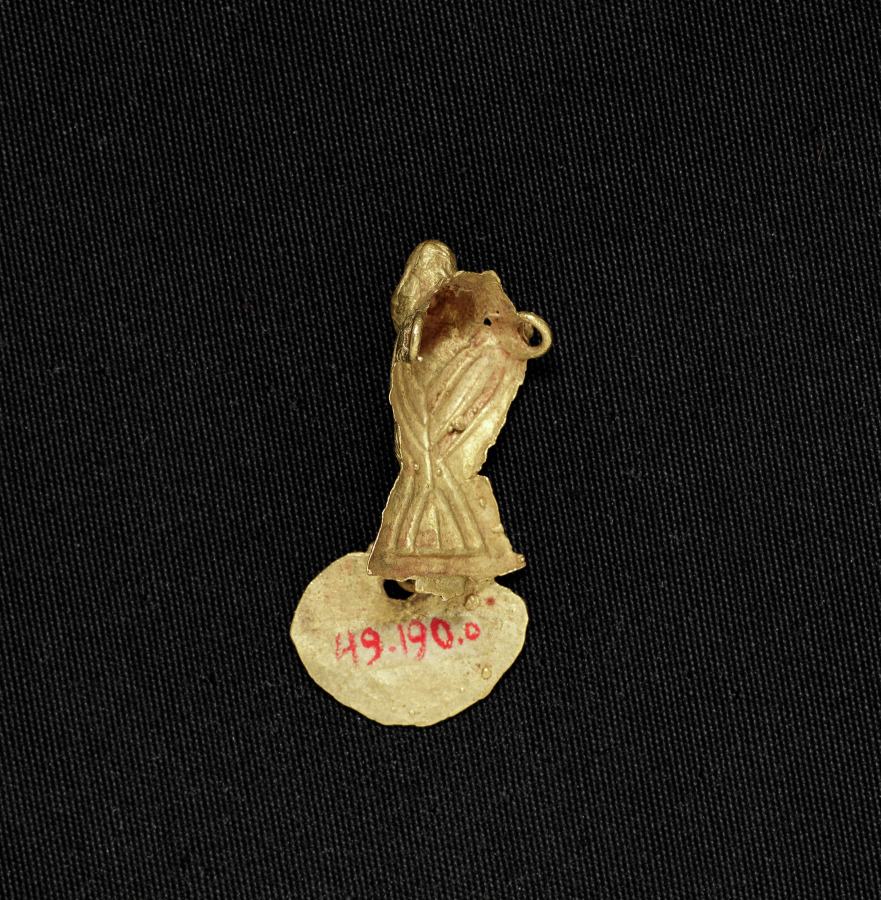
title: Bird Bead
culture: Colombia, Muisca style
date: c. 900–1550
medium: cast gold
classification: Jewelry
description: Muisca metalwork divides into two categories: ornaments to be worn, such as these, and offering figurines, in the case to the right. The elaborate bird pendant features delicate herringbone moldings, openwork patterns, and wing details-all part of the wax model from which the pendant was cast (see nearby computer animation). The dangles were attached after casting.